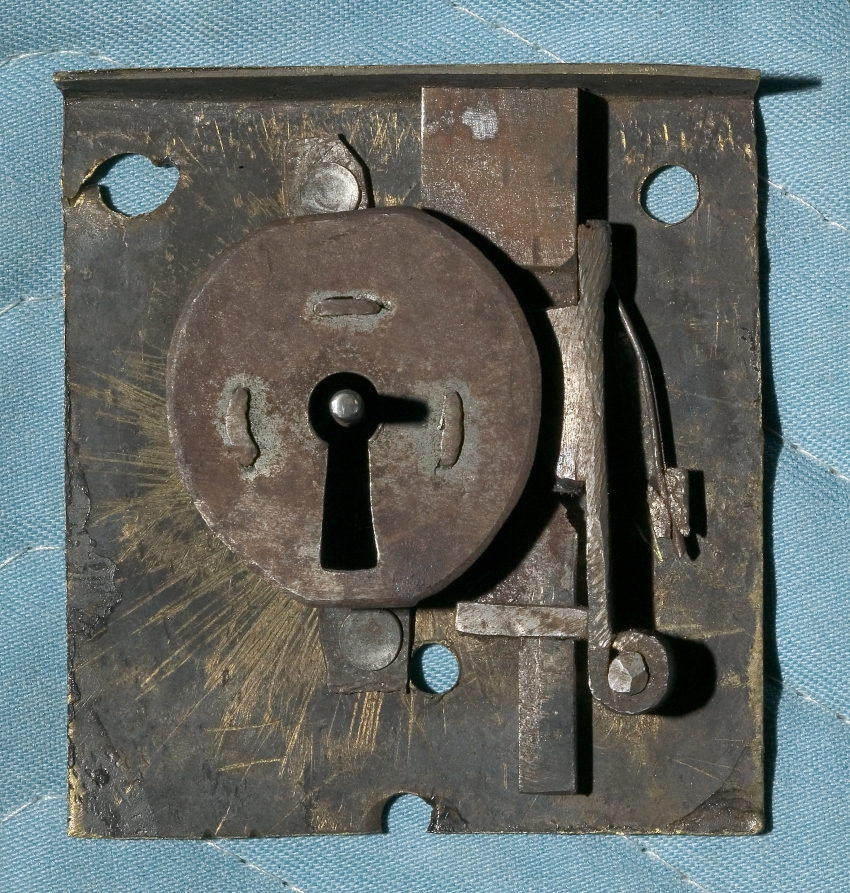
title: Table Desk (Bureau Plat)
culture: France, 18th century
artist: Bernard II van Riesen Burgh (Dutch, 1766)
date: c. 1750– 1760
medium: wood marquetry with gilt bronze mounts, leather top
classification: Furniture and woodwork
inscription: signed three times on bottom edge of apron: B. V. R. B.